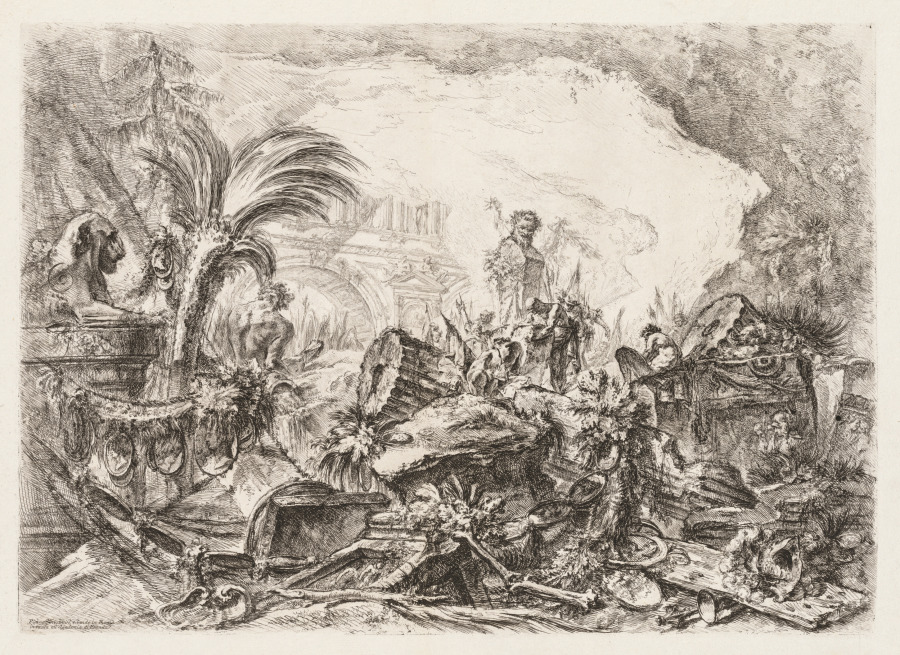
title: The Triumphal Arch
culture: Italy, 18th century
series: Grotteschi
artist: Giovanni Battista Piranesi (Italian, 1720–1778)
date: 1745–50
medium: etching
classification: Print